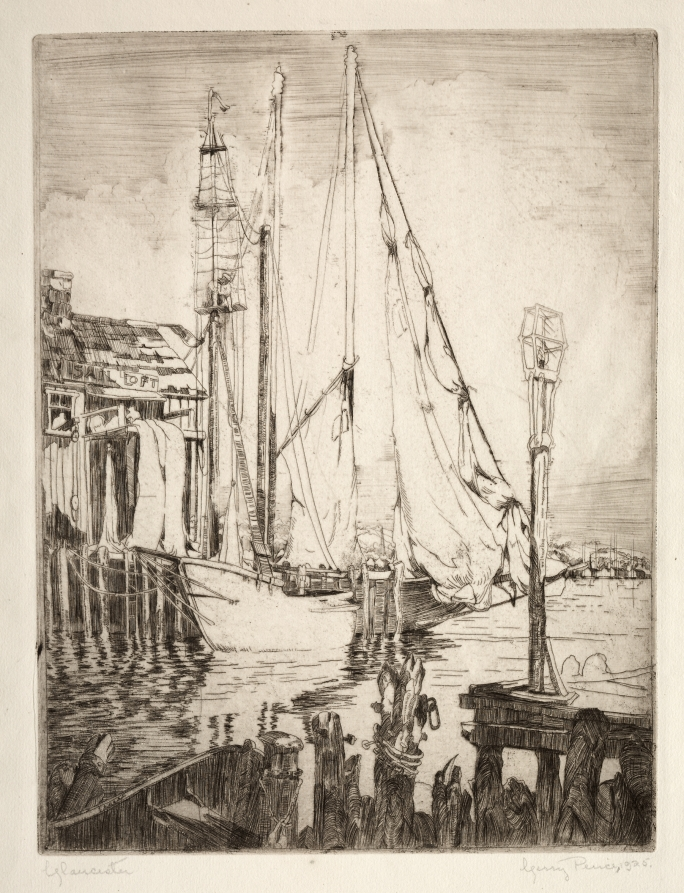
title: Gloucester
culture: America, Ohio, Cleveland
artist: Elbridge Gerry Peirce (American, 1900–1969)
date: 1925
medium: etching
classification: Print